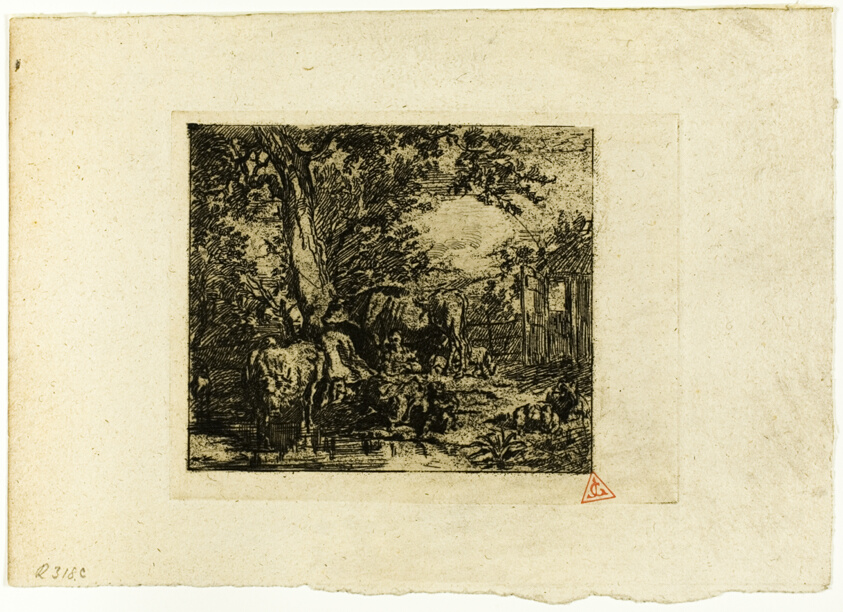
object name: Print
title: Landscape with Animals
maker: Charles Émile Jacque (French, 1813-1894)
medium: Etching and drypoint on buff laid paper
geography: France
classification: etching; print; prints and drawing